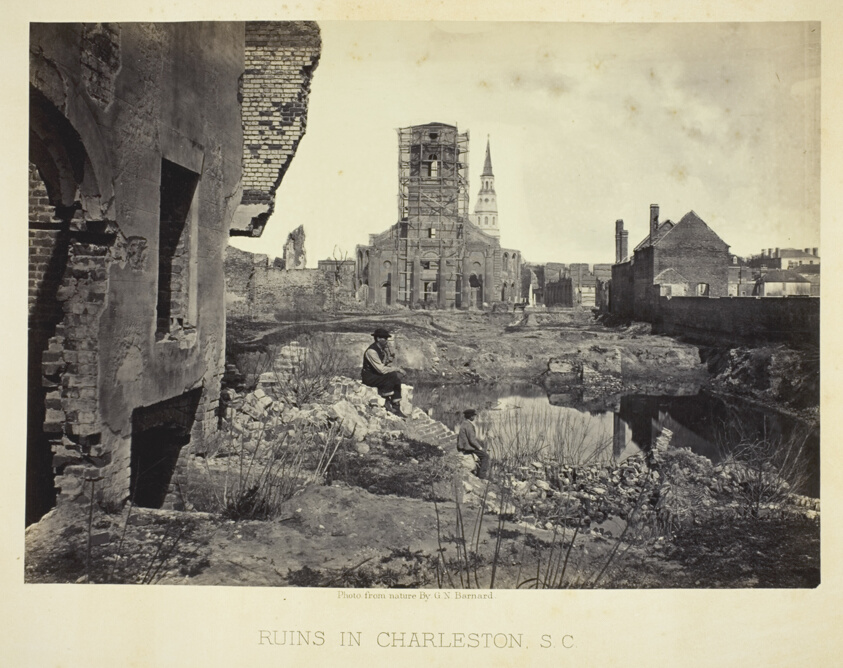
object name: Photograph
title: Ruins in Charleston, S.C.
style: 19th century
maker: George N. Barnard (American, 1819–1902)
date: 1865/66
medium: Albumen print, plate 60 from the album "Photographic Views of the Sherman Campaign" (1866)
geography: United States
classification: albumen silver print; photographic process; photography; photograph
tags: Collected by Hugh Edwards, Sherman's Campaign 1866, documentary